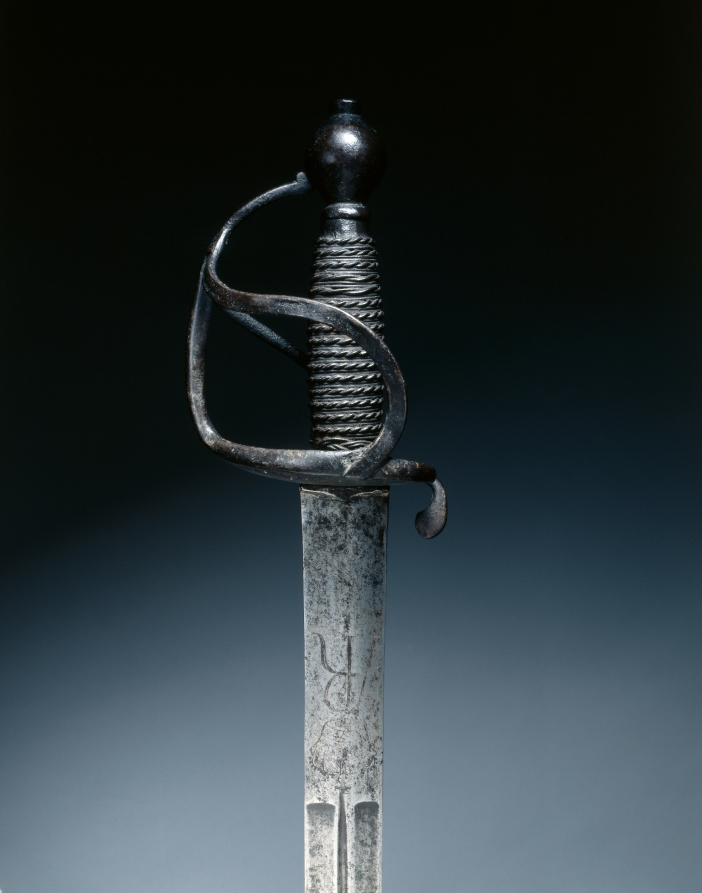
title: Cavalry Sword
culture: Germany, Saxony, 18th century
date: c. 1700–30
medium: steel (vestiges of blueing and gilding on hilt); wire grip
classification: Arms and Armor